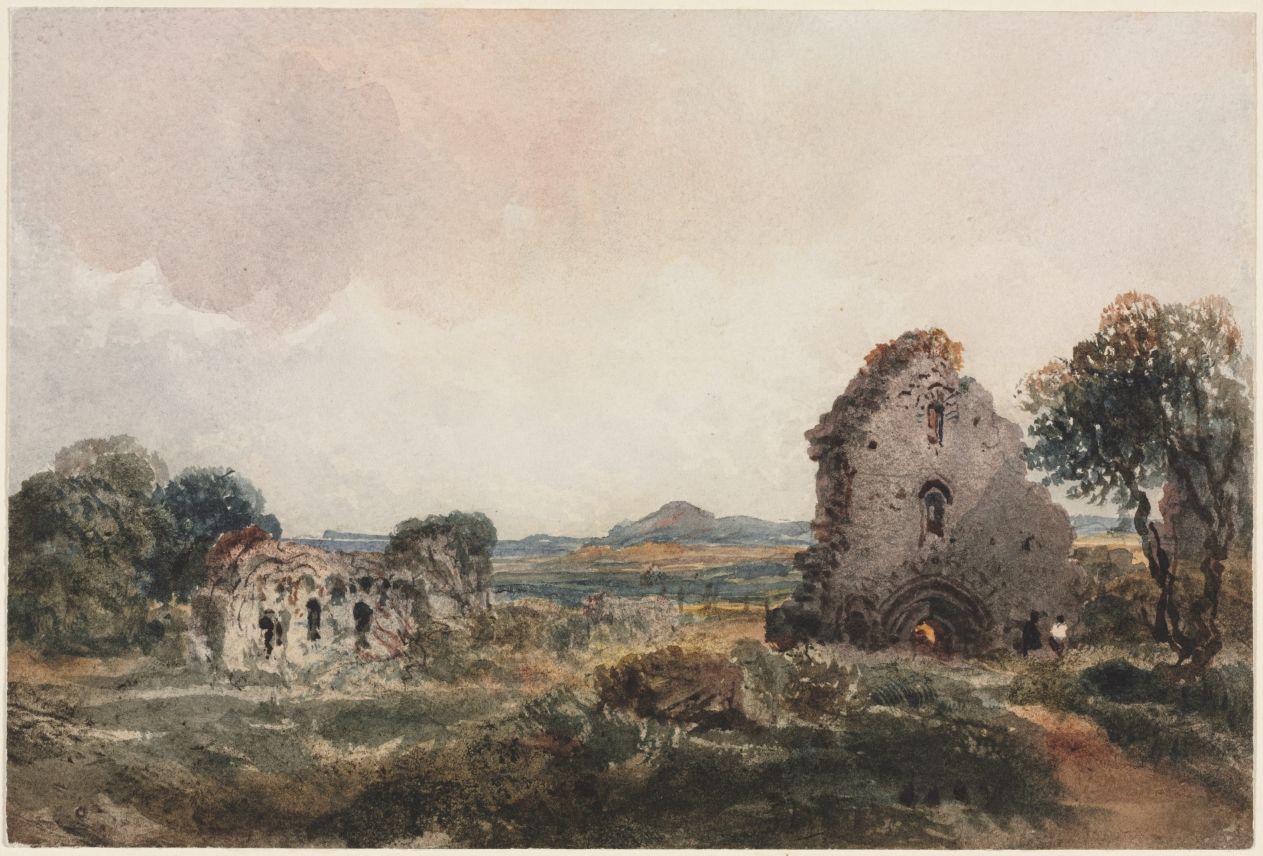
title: Neath Abbey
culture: England, 19th century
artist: Peter De Wint (British, 1784–1849)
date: c. 1840s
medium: watercolor with traces of graphite underdrawing and scratch-away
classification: Drawing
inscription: inscribed, in graphite, on verso: P. DeWint / Near North South Wales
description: Among the key artists of the golden age of watercolor painting in England, Peter DeWint was known for his panoramic views of spacious, seemingly commonplace landscapes rendered in broad washes of earth-tone hues. This drawing depicts the ruins of Neath Abbey, a Cistercian monastery established in the early 12th century in south Wales. From the Tudor period there was industrial activity around the abbey, and by the time DeWint was painting the priory, the Neath Abbey Iron Company had engulfed the environs of the church with copper smelting and manufacture. DeWint chose to omit evidence of the transformation of the area and its role in the Industrial Revolution.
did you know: Peter DeWint traveled abroad only once, to Normandy, and was disappointed with the landscape outside of his native England.